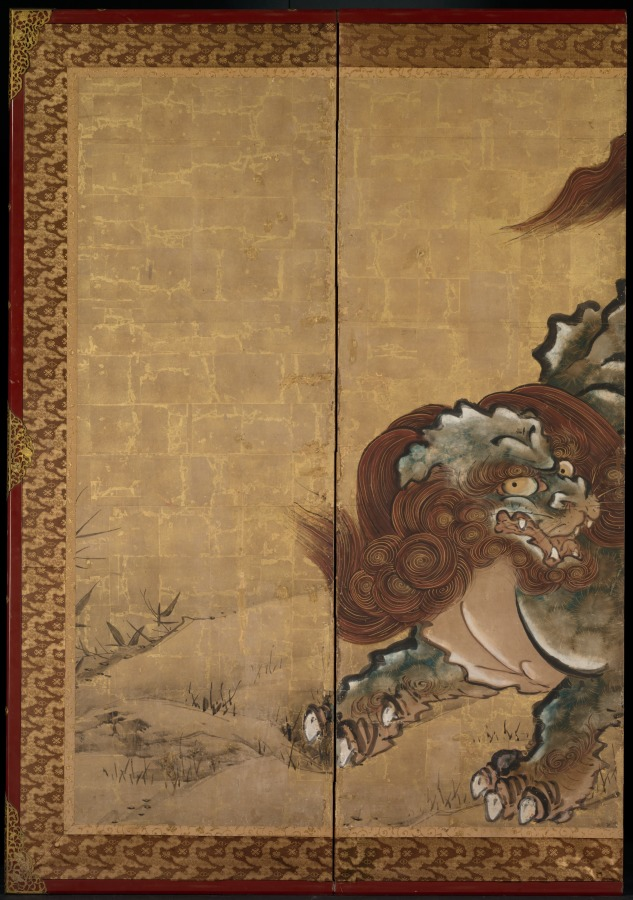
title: Lions and Tigers in Peony and Bamboo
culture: Japan, Edo period (1615–1868)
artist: Yamaguchi Sekkei (Japanese, 1644–1732)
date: 1668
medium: One of a pair of six-panel folding screens; ink and color on gilded paper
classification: Painting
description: Sekkei lived and studied painting in Kyoto at the Kano school studio, the center of traditional painting activity in Japan since 1500. The use of gold foil as a backdrop for the frolicking animals served a practical as well as a decorative function. Because traditional Japanese rooms had no windows, interior lighting came from portable oil lamps and wax candles, whose effects were magnified by reflective surfaces.